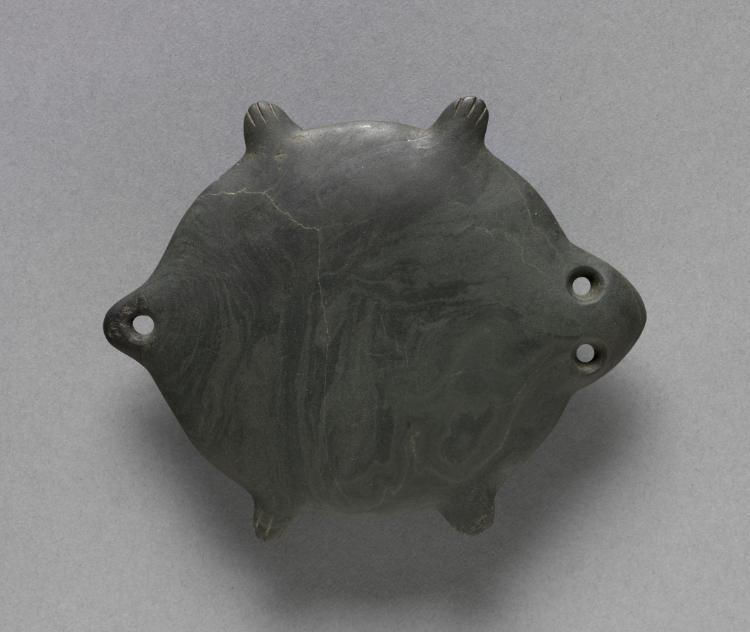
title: Palette in the Form of a Turtle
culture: Egypt, Predynastic (5000–2950 BCE), Naqada IIa–IIIa (3650–3000 BCE)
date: c. 3500–3050 BCE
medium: graywacke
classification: Implements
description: Stone palettes were used for grinding eyepaint worn by men and women alike for cosmetic purposes and to protect against sun glare and eye infections. There were two types of eyepaint: green, made from malachite (copper ore), and black, made from galena (lead ore). Small quantities of ore are sometimes found in graves alongside the palettes.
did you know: This is an ancient makeup palette used to blend and apply cosmetics.